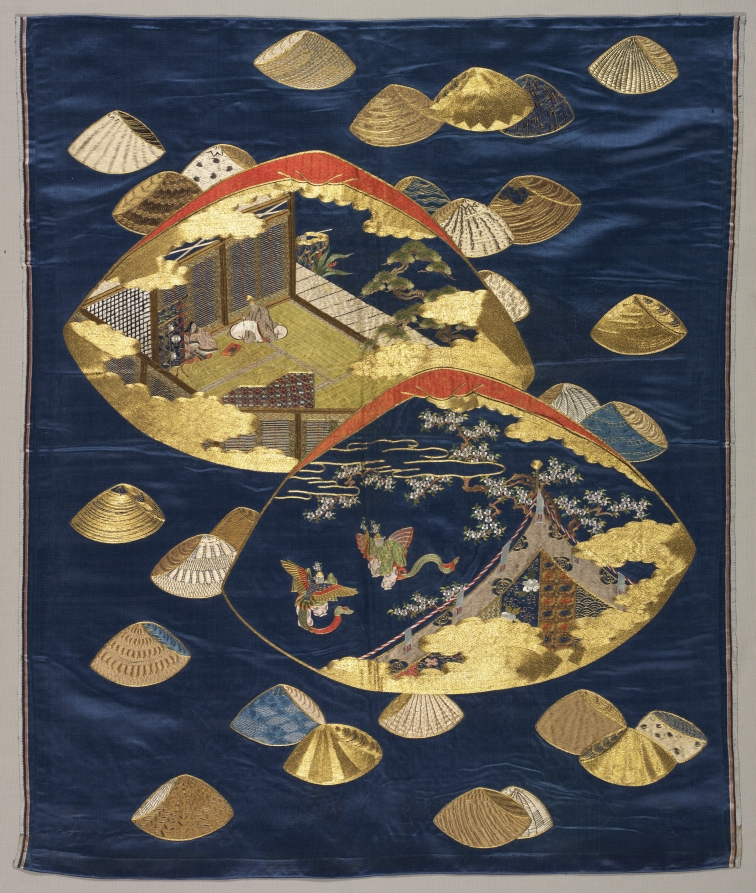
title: Gift Cover (Fukusa) with Tale of Genji Shell-Matching Game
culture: Japan, Meiji period (1868–1912)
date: 1868–1912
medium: Silk: embroidered; metallic thread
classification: Embroidery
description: Japanese elites once presented gifts in boxes with gift covers (fukusa) draped over them. The decorated covers were typically lined with a monochrome backing, but this one’s borders are exposed. Its design is a Tale of Genji shell-matching game. Two clamshells shown in close-up are painted with scenes from two chapters of the novel. The one on the bottom is an episode from the “Kochō” (Butterflies) chapter, in which Genji’s beloved Murasaki sends her young attendants to dance for the empress. The one on the top may depict Genji writing a poem in the “Suzumushi” (Bell Cricket) chapter.